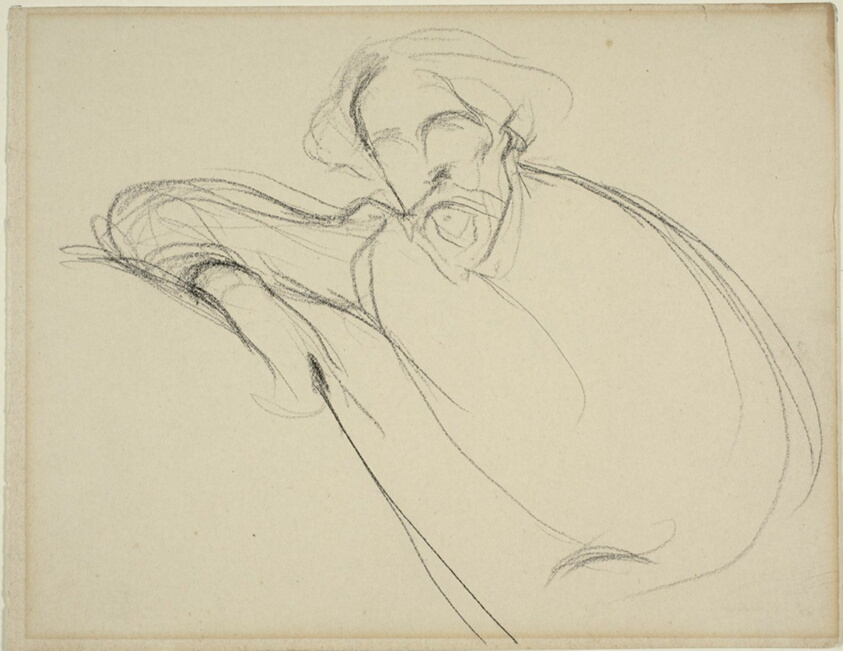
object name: Drawing and Watercolor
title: Study of Alphonse Daudet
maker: Eugène Carrière (French, 1849-1906)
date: c. 1893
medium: Black crayon, on buff wove paper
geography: France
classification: crayon; drawings (visual works); prints and drawing